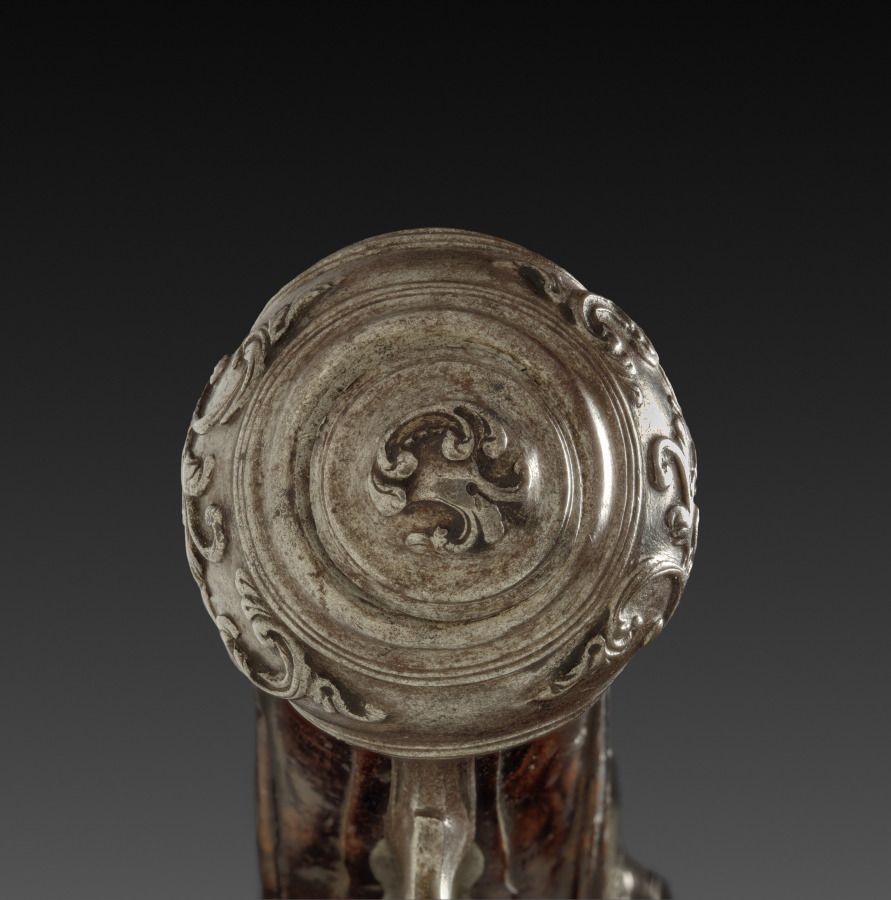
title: Flintlock Pistol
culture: Italy, Brescia, 18th century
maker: Bortolo Agazzi (Italian)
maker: Lazaro Lazarino (Italian)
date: 1700s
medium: steel with traces of gilding; walnut stock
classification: Arms and Armor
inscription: on lock: Bortolo Agazzi; on barrel: Lazaro Lazarino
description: The flintlock was the most popular style of lock in all of Europe in the mid 1600s through the 1700s except in Spain and Italy where the snaphance was more dominant. This pistol's shine comes from the gold that was applied to the steel shaft. This shiny surface is set off by the rich walnut stock. Upon close inspection, you can see areas of damage to the walnut and even a missing section of decoration on the rear of the handle.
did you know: The term flintlock is used to describe any firearm that uses a flint-striking ignition mechanism.